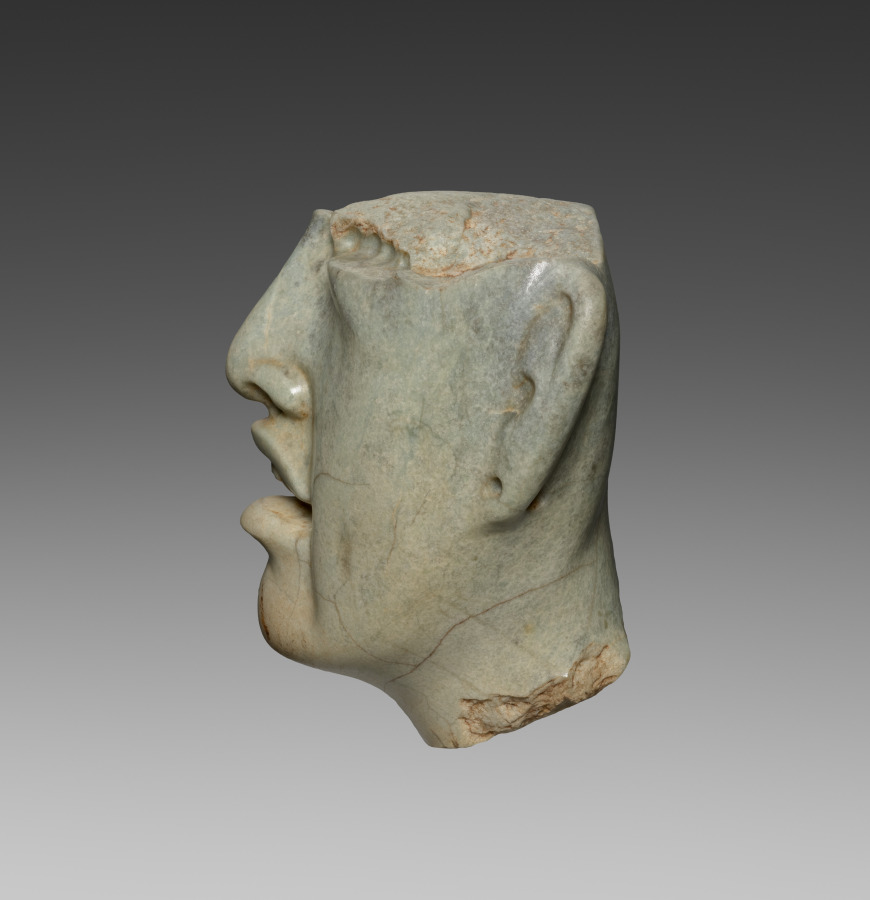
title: Head Fragment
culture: Mesoamerica, Mexico, Olmec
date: c. 900–300 BCE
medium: jadeite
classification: Jade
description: This sensual head fragment may come from a seated or standing figure like those shown nearby, though much larger. The carving is exceptionally fine, from the slight under-eye puffiness to the delineation of the fleshy lips and the teeth. The profile face of supernatural being is incised just in front of each ear, perhaps indicating that the subject had special power.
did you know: In ancient Mesoamerica, jade was more valuable than gold.